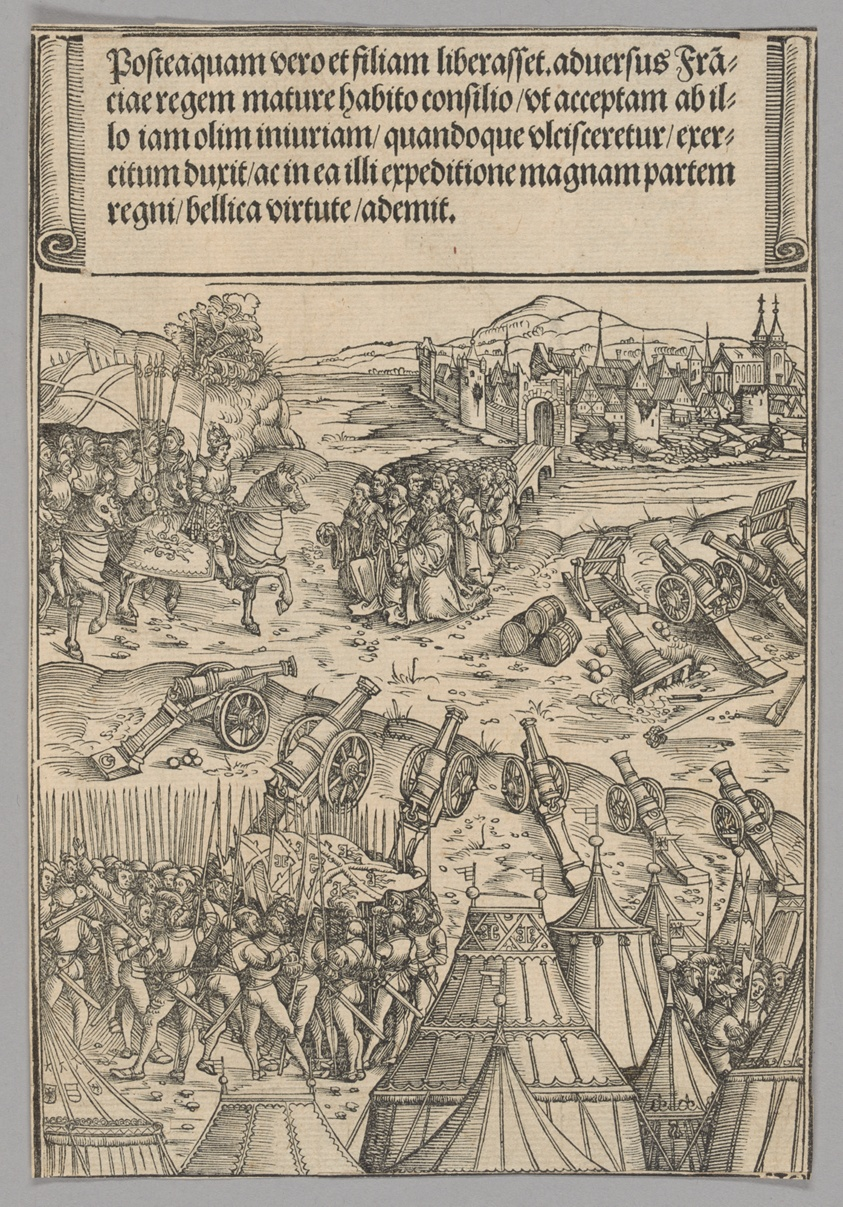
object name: Print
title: Capitulation of a French City, plate 12 from Historical Scenes from the Life of Emperor Maximilian I from the Triumphal Arch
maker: Wolf Traut (German, c. 1480-1520); printed by Hieronymus Andreae (German, died 1556)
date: 1515-17, printed c. 1520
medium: Woodcut in black ink on cream laid paper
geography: Germany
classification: print; paper; woodcut; prints and drawing